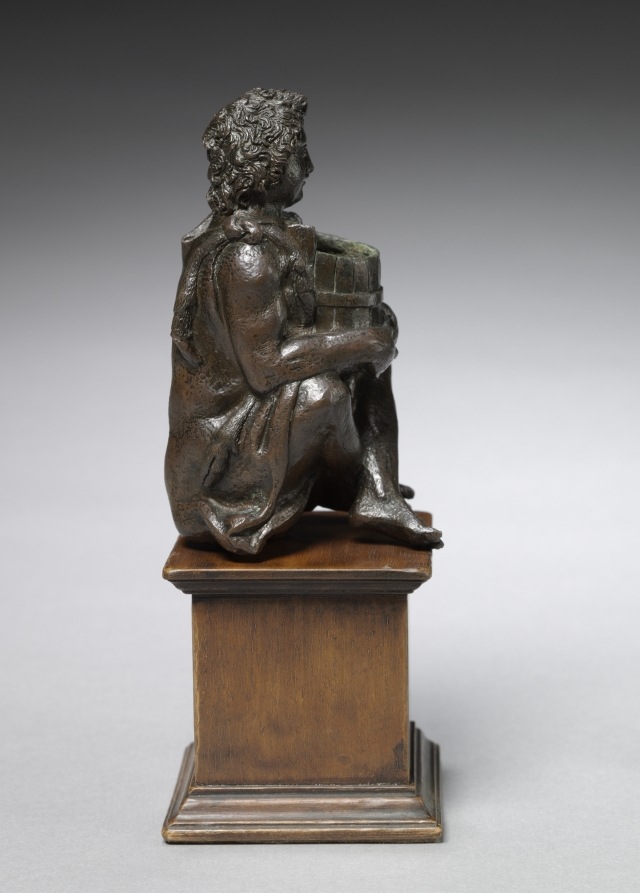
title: Seated Boy Clothed with Goat Skins Holding an Open Barrel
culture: Italy, Padua, 16th century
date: c. 1525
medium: bronze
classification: Sculpture